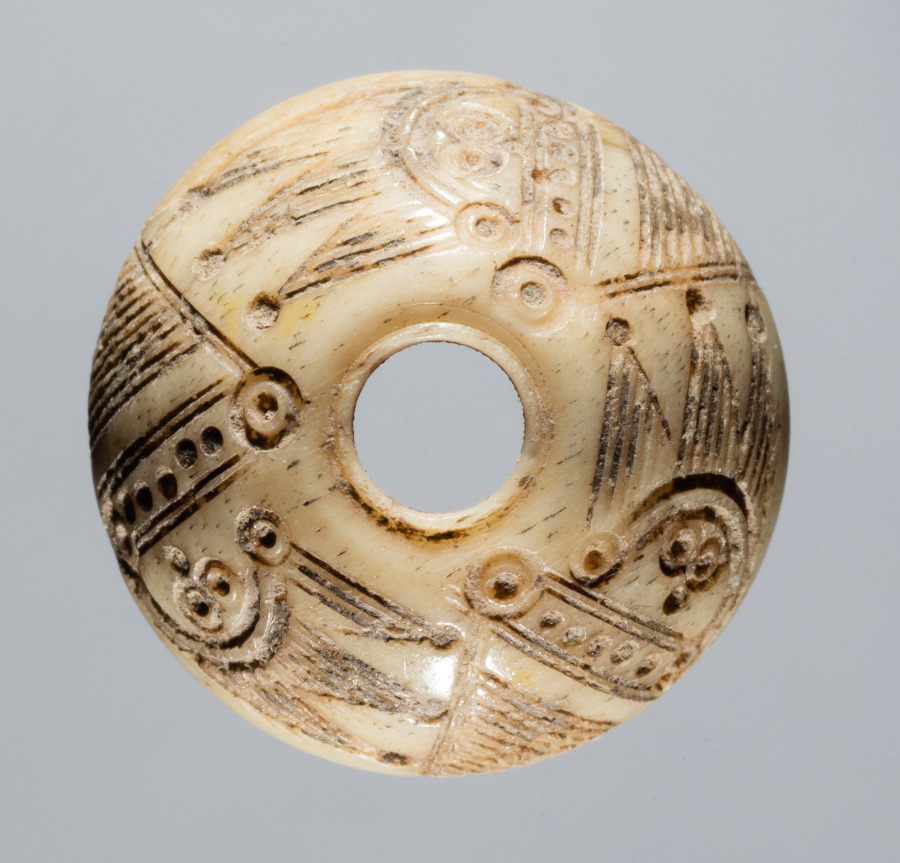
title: Spindle Whorl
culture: Iran, early Islamic period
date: 700s - 900s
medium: bone, incised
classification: Spindle Whorl